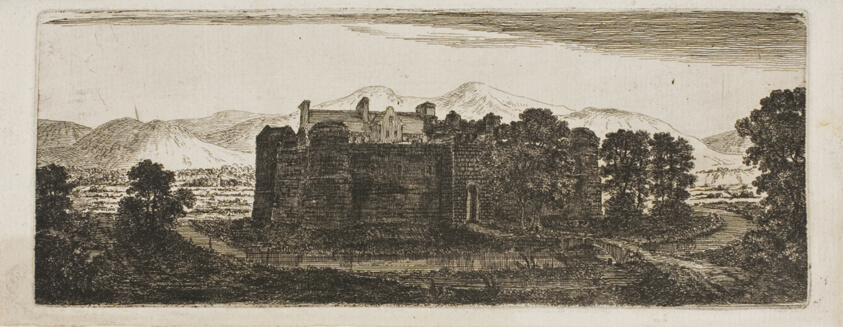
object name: Print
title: Boghall from Biggar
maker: John Clerk of Eldin (Scottish, 1728-1812)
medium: Etching on paper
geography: Scotland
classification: etching; print; prints and drawing